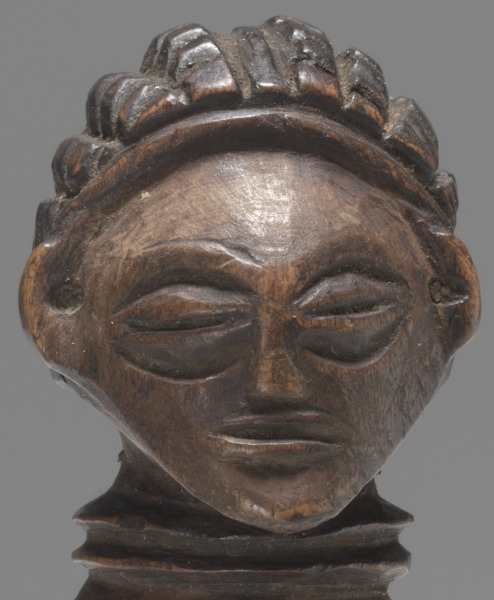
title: Whistle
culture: Central Africa, Democratic Republic of Congo or Angola, Chokwe people, late 19th century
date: late 1800s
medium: Wood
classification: Musical Instrument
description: Carved out of ivory or wood in a variety of shapes, Chokwe whistles often bear miniature, stylized renderings of masks. Cikunza, the "patron saint" of the boys' initiation into manhood, is depicted with a pointed extension imitating the horn of a road antelope, symbolizing the fertility spirit. Typically such whistles were used by men during the hunt to communicate with their co-hunters and to call their dogs. They were either worn attached to a string as a necklace or tied to a spear.